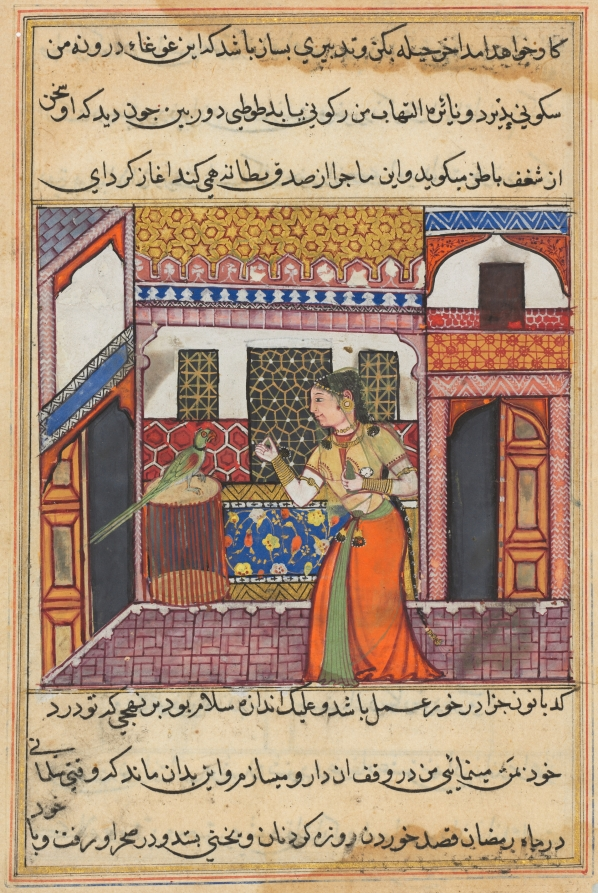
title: The parrot addresses Khujasta at the beginning of the forty-third night, from a Tuti-nama (Tales of a Parrot)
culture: Mughal India, court of Akbar (reigned 1556–1605)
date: c. 1560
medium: gum tempera, ink, and gold on paper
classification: Painting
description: In this brightly patterned scene, Khujasta prepares to leave for a clandestine rendezvous. However, she is stopped by Tuti the parrot, who tells her moralizing stories that last until sunrise. Multiple architectural spaces have been flattened as though they were made using paper cutouts. Khujasta stands on the pink tiled floor of a courtyard. Behind her the blue carpet on the floor of a covered porch has been tilted up vertically below the red tiled lower wall decor. Lattice windows reveal the darkness of night. The golden tile patterns above the protrusions of the pink stone roof appear to indicate the floor of the roof above.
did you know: Khujasta holds a packet of paan for freshening the breath in her left hand.